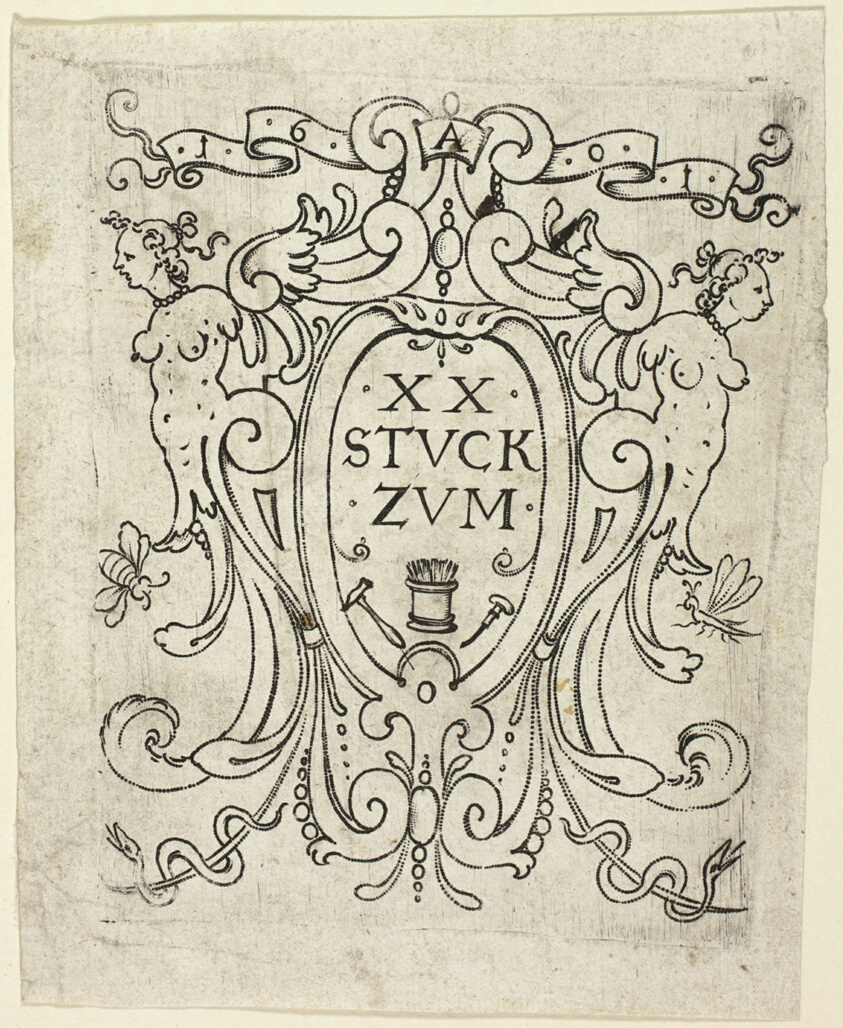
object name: Print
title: Title page, from XX Stuck zum (ornamental designs for goblets and beakers)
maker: Master A.P. (German, active early 17th century)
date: 1601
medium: Punch engraving with traces of burin in black on ivory laid paper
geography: Germany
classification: engraving; print; prints and drawing